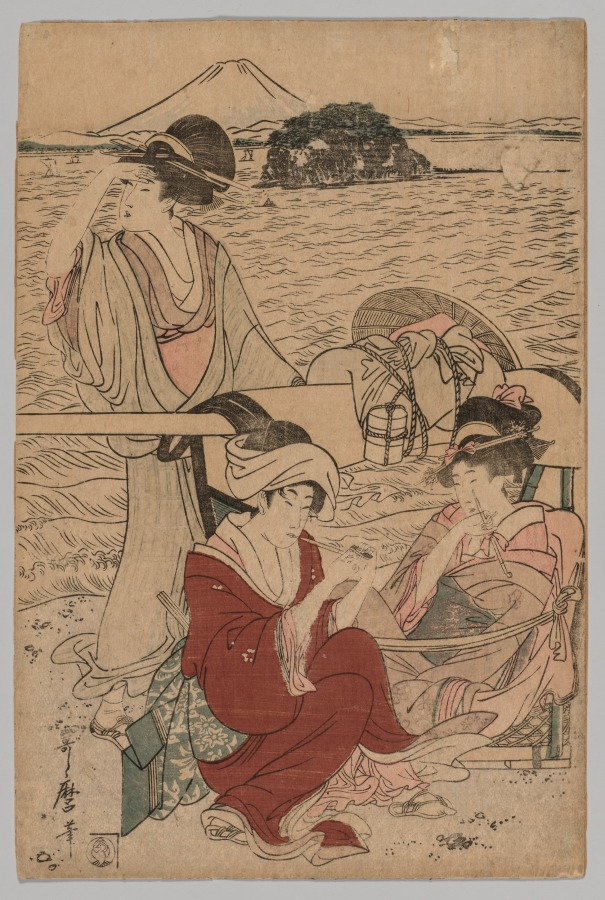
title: No Title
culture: Japan, Edo period (1615–1868)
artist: Kitagawa Utamaro (Japanese, c. 1754–1806)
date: 1753–1806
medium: color woodblock print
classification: Print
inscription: Signature: Utamaro fude